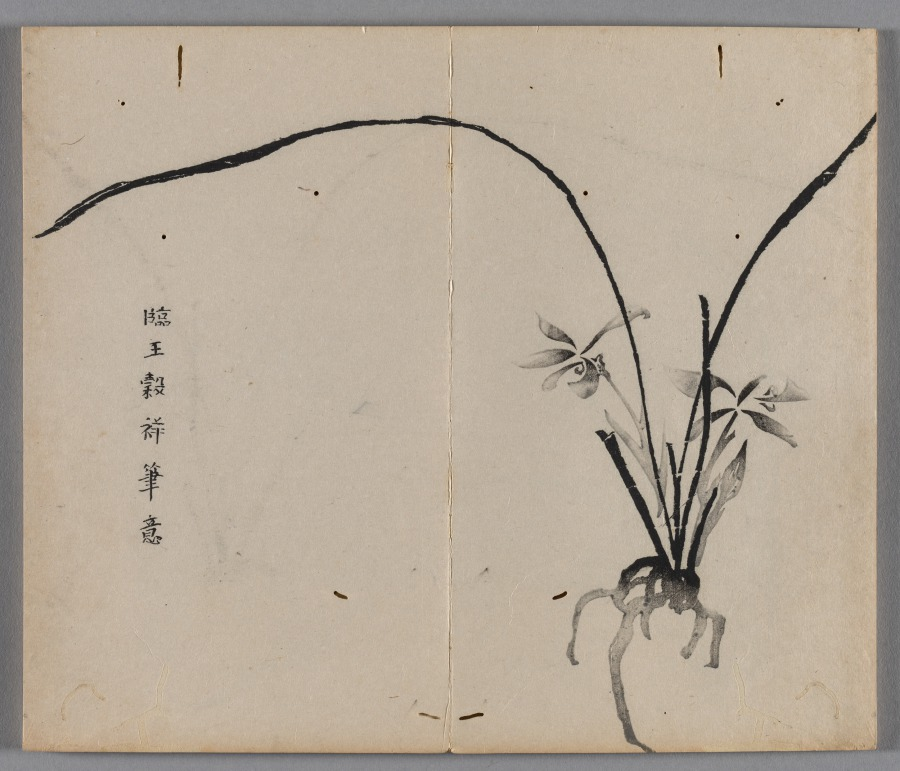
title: Ten Bamboo Studio Painting and Calligraphy Handbook (Shizhuzhai shuhua pu): Orchids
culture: China, Qing dynasty (1644-1911)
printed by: Hu Zhengyan (Chinese, c. 1584–1674)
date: 1633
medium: Woodblock-printed book; ink and colors on paper; first edition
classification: Print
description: Color printing reached a level of perfection in the early 1600s, as seen in this Ten Bamboo Studio Collection of Calligraphy and Painting and the Mustard Seed Garden Manual of Painting (printed 1679 and 1701). The painterly quality, precision in registering (aligning) the woodblocks, and harmonious colors made them the most successful color print editions in Chinese history. Both editions were printed and compiled in Nanjing, spread nationwide, and had a great impact on the arts in Japan and Korea.